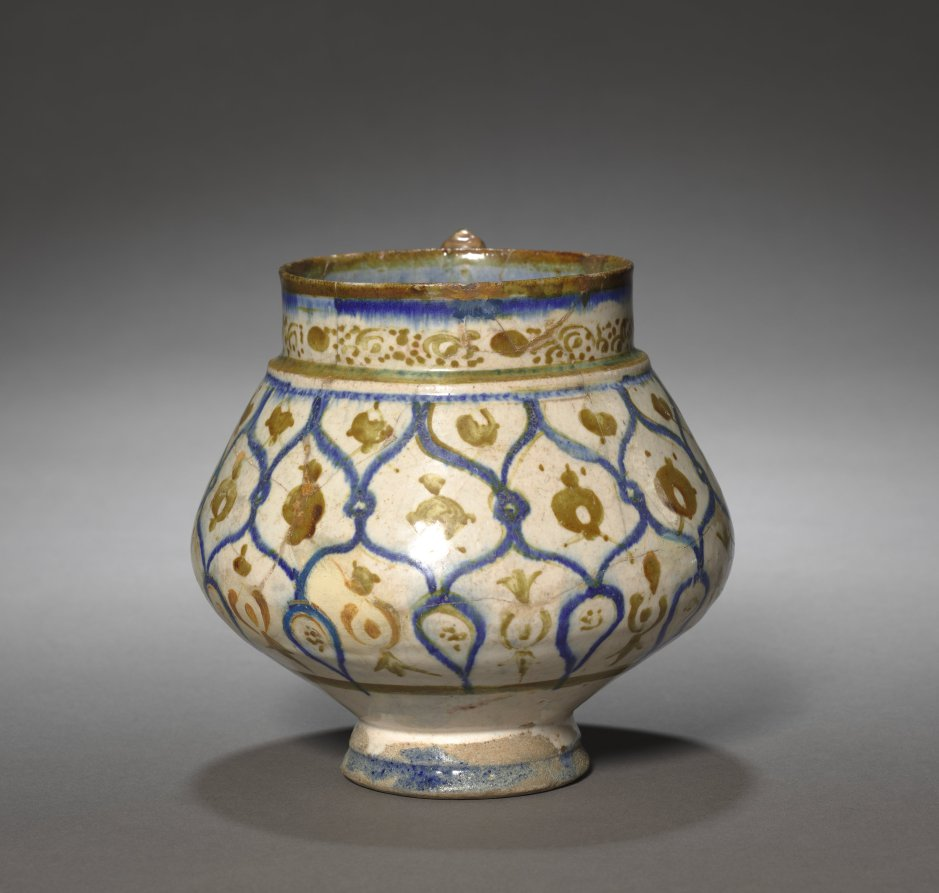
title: Jug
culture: Iran, Kashan, Seljuq period of Iran (1037–1194)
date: 1170–1220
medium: fritware with luster-painted design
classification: Ceramic